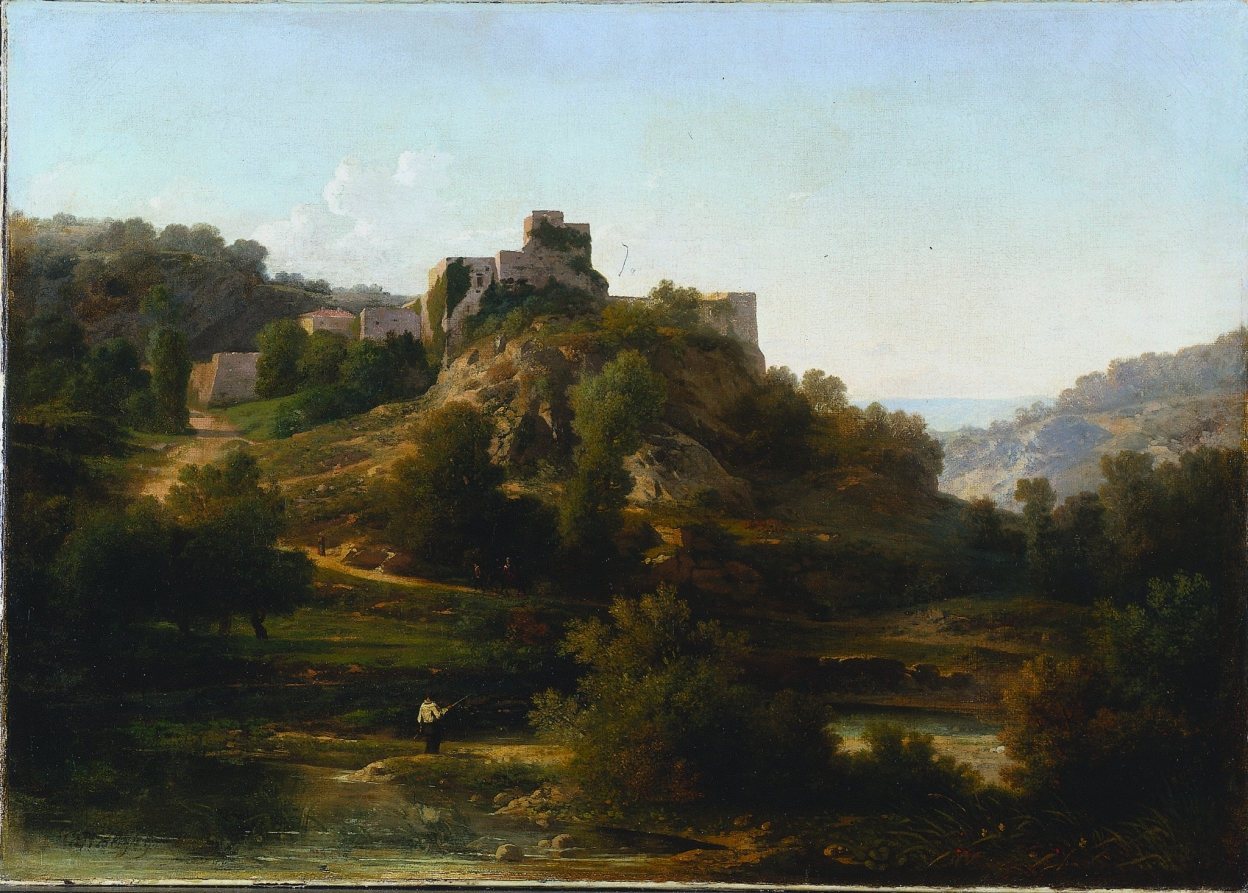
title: Châteauvieux-sur-Suran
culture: France, 19th century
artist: Antoine-Claude Ponthus-Cinier (French, 1812–1885)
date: 1848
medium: oil on paper mounted on fabric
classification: Painting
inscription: Signed lower left: [?] Aligny [false] / [mostly covered signature a little further to the right:] Ponthvs cinier Distinguishing marks on reverse: handwritten on stretcher: C'Aligny Vue d'Italie; handwritten label: Aligny / Paysage dans le Midi de la France / 1; French customs stamp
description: This view of a ruined building on a rocky cliff in Châteauvieux above the Suran river in the French Alps is constructed in the manner of a classical or ideal landscape. Forms recede at a measured pace along a sinuous, curving path that passes through carefully defined planes of fore, middle, and background. The warm, glowing light and imaginary figures pursuing their daily tasks contribute to the mood of timeless, pastoral bliss.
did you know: The son of a merchant, Ponthus-Cinier was one of the principle artists of the School of Lyon and painted neoclassical views of the countryside around Lyon and the Alpine region near the Swiss border.